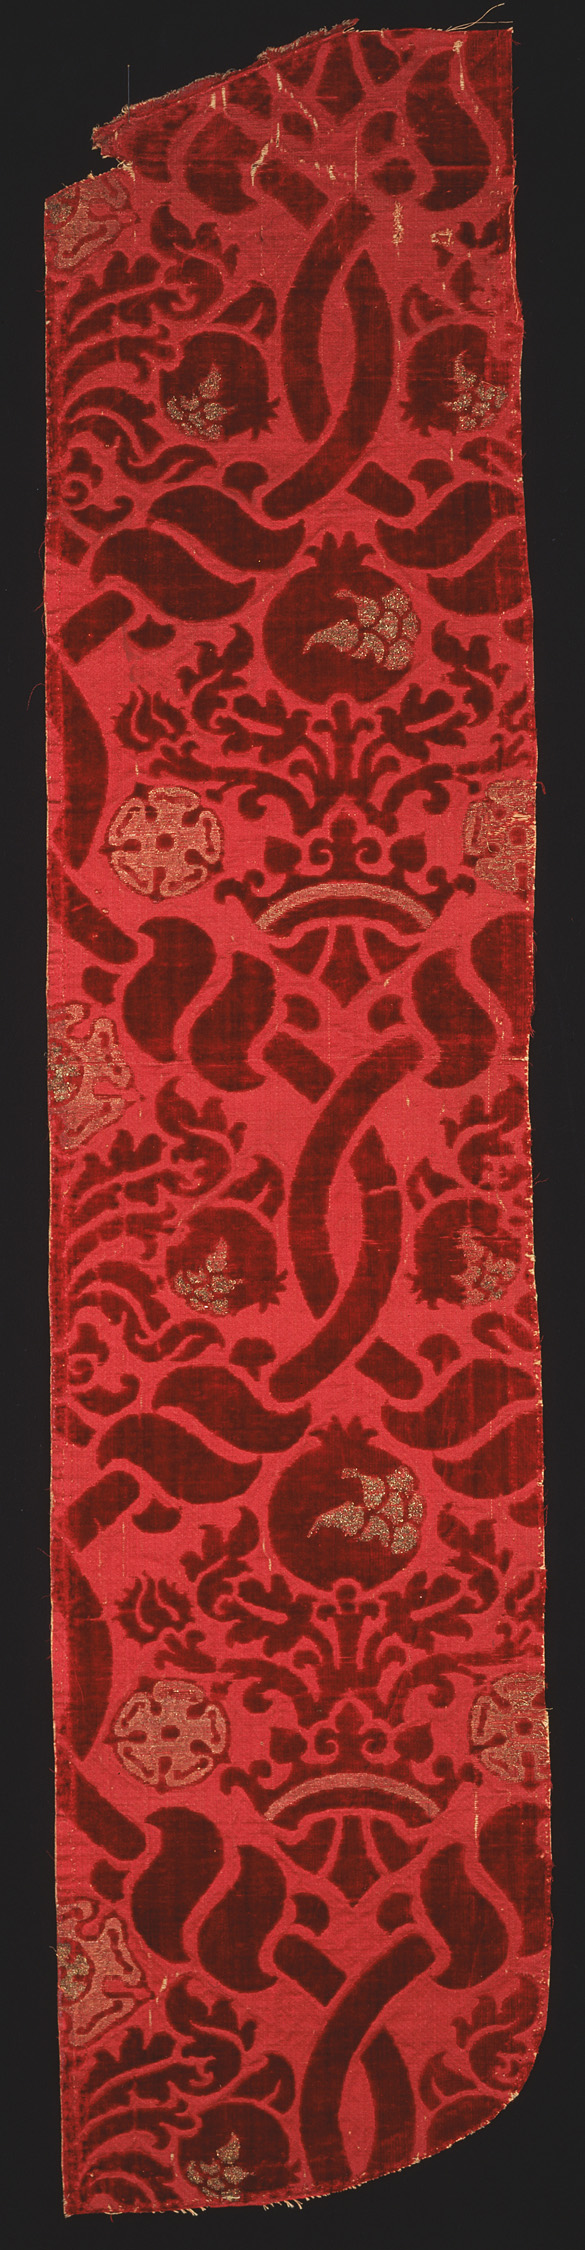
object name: Textile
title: Fragment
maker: Italy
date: 1501/50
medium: Silk and gilt-metal-strip-wrapped silk, satin weave with supplementary brocading wefts forming weft loops in areas and supplementary pile warps forming cut voided velvet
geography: Italy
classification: textile; weaving - velvet